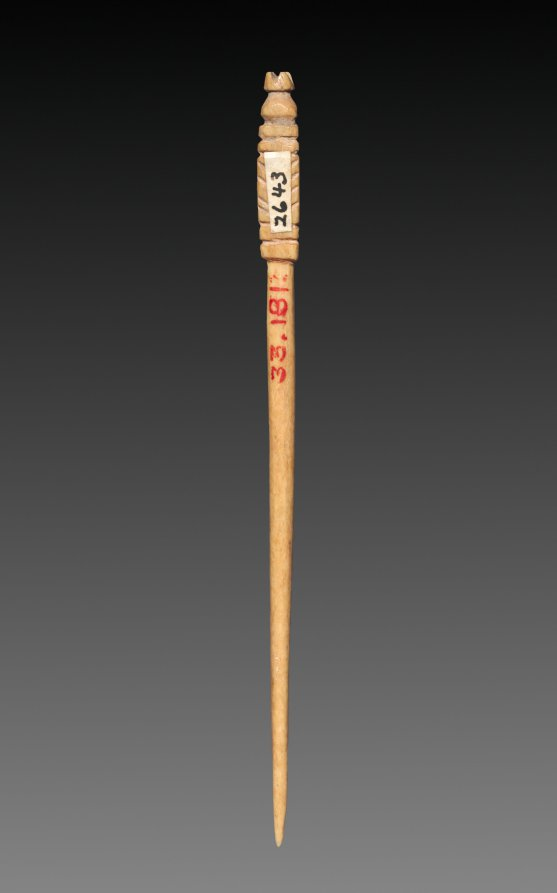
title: Stick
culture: Parthian Empire (247 BCE–224 CE)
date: 1–200 CE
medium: bone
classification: Miscellaneous